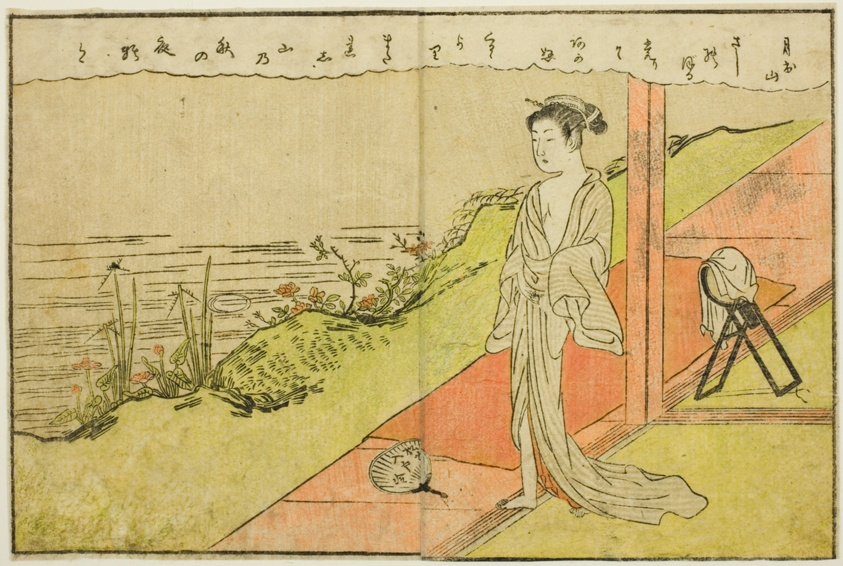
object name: Print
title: Double-page Illustration from Vol. 1 of "Picture Book of Spring Brocades (Ehon haru no nishiki)"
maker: Suzuki Harunobu 鈴木 春信; Japanese, 1725 (?)-1770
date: 1771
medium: Color woodblock print; double-page illustration from book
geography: Japan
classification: woodblock print; print; asian art